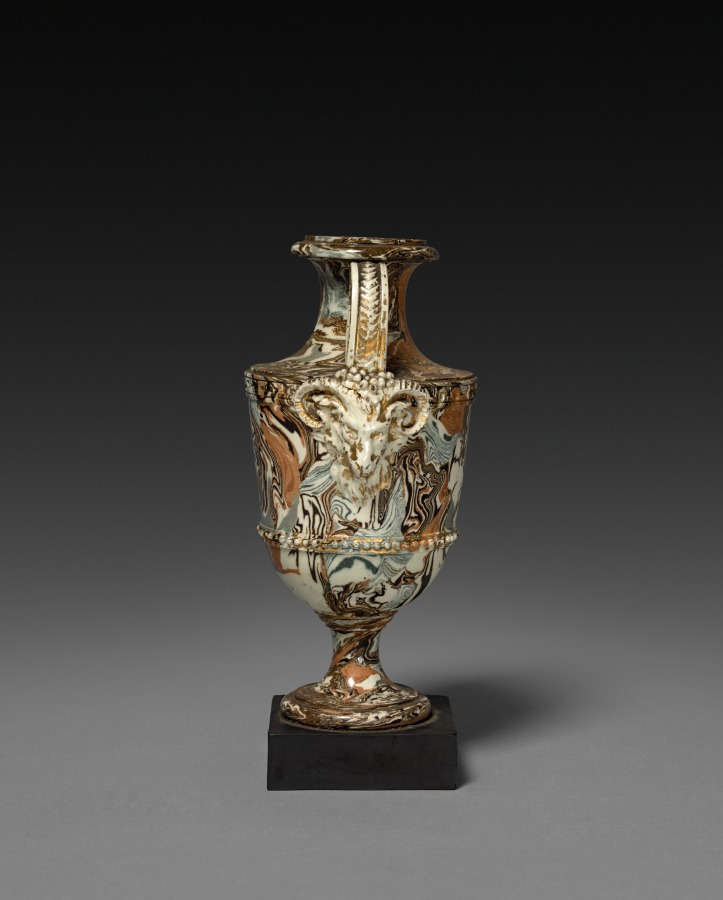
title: Urn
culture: England, late 18th or 19th century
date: late 1700s - 1800s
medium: earthenware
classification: Ceramic